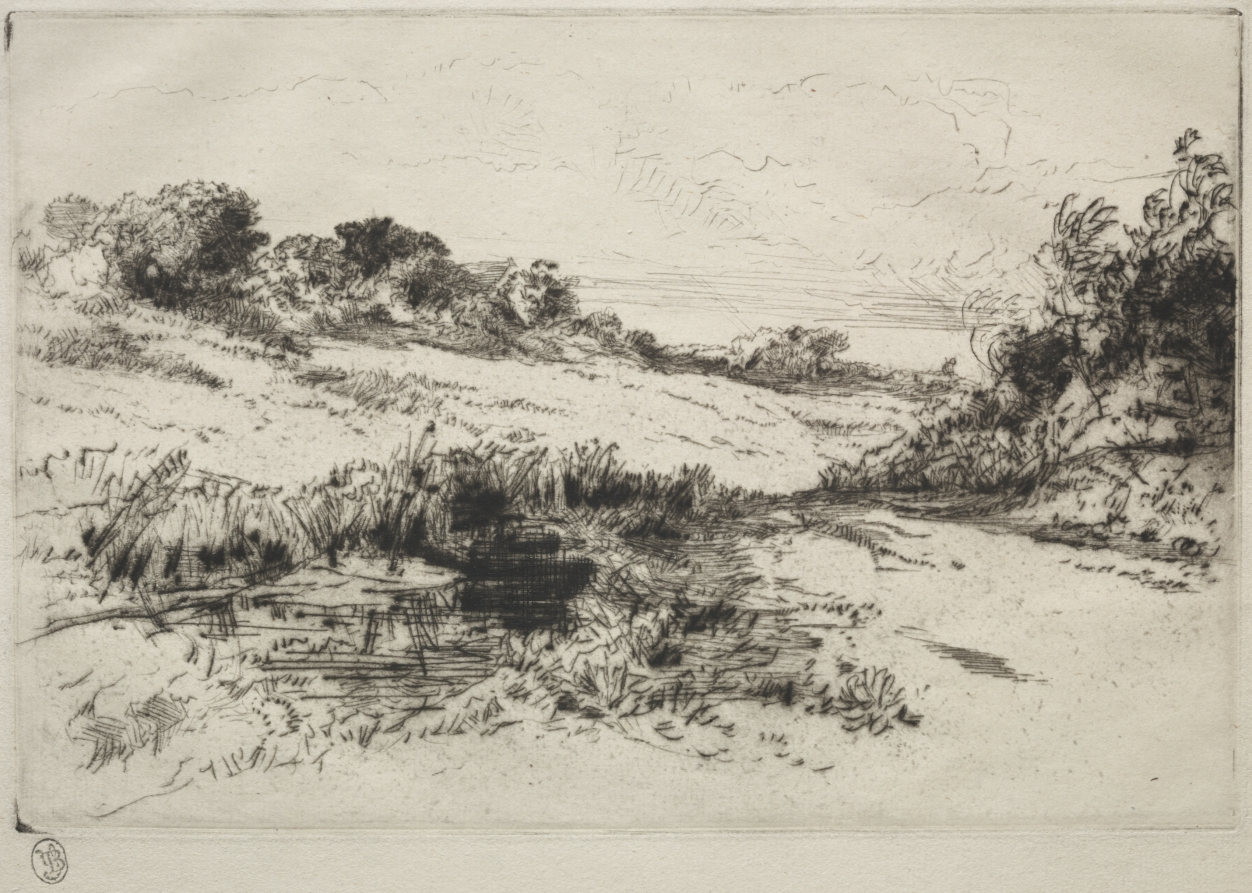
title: Windmill Hill, No. 1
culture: England, 19th century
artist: Francis Seymour Haden (British, 1818–1910)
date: c. 1877 and later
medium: etching and drypoint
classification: Print